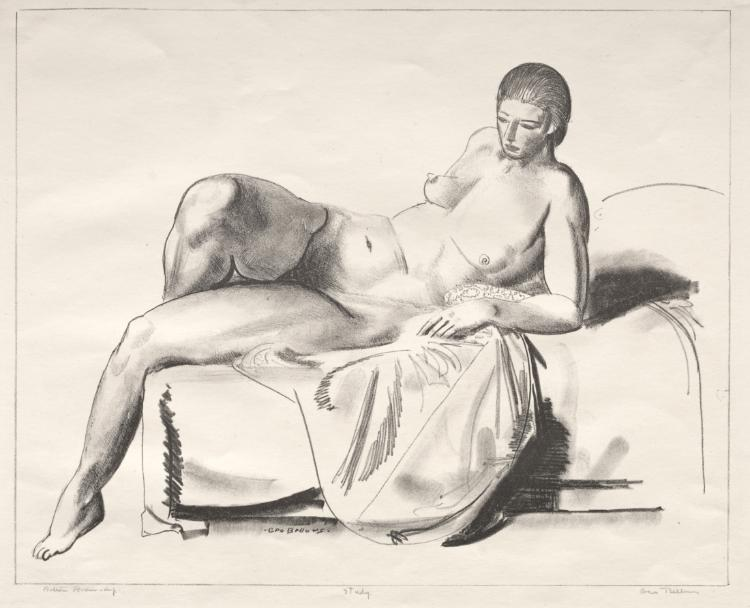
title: Nude Study, Classic on a Couch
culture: America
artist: George Bellows (American, 1882–1925)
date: 1924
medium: lithograph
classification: Print